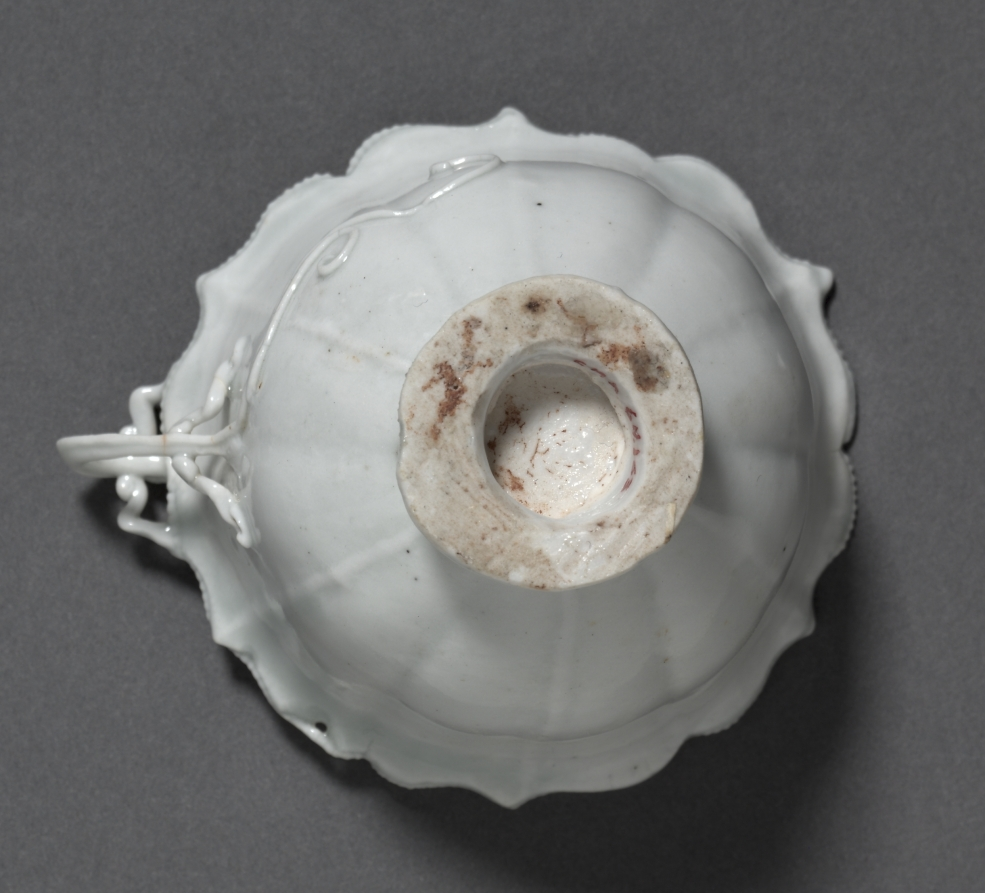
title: Fluted Cup with Dragon Handle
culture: China, Jiangxi Province, Jingdezhen kilns, Yuan dynasty (1271–1368)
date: early 1300s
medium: Glazed porcelain, Qingbai (bluish-white) ware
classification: Ceramic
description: Very thinly potted, the subtly lobed body of this cup is almost translucent. The thin, slightly opaque, light greenish glaze lends a sugary shine. Applied elements, including the handle, beaded borders, and sculptural floret, are constructed and glazed with the same materials as the body, providing a seamless blend of form and decorative embellishment. The result is an evocative reminder of slightly earlier silver cups, also created in the form of flowers. This pristine, natural construction is challenged, however, by the archaic dragon that acts as the handle. Borrowed from the decoration found on much earlier bronzes, this added form illustrates the eclecticism of the Yuan, the attempt to blend present vision with interest in the past.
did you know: Clay beading divides the cup's interior into six foliate panels with a six-petaled flower at the junction of the beaded lines.